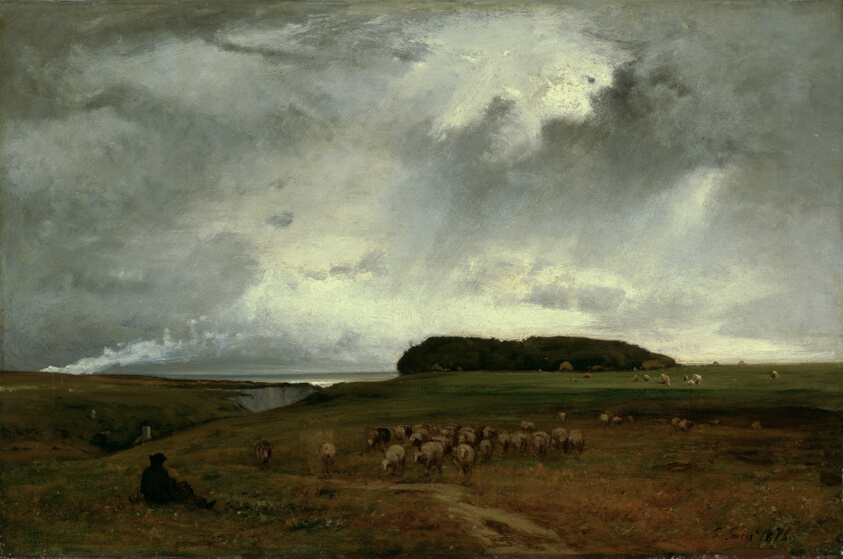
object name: Painting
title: The Storm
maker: George Inness (American, 1825–1894)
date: 1876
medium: Oil on canvas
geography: United States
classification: painting; american arts